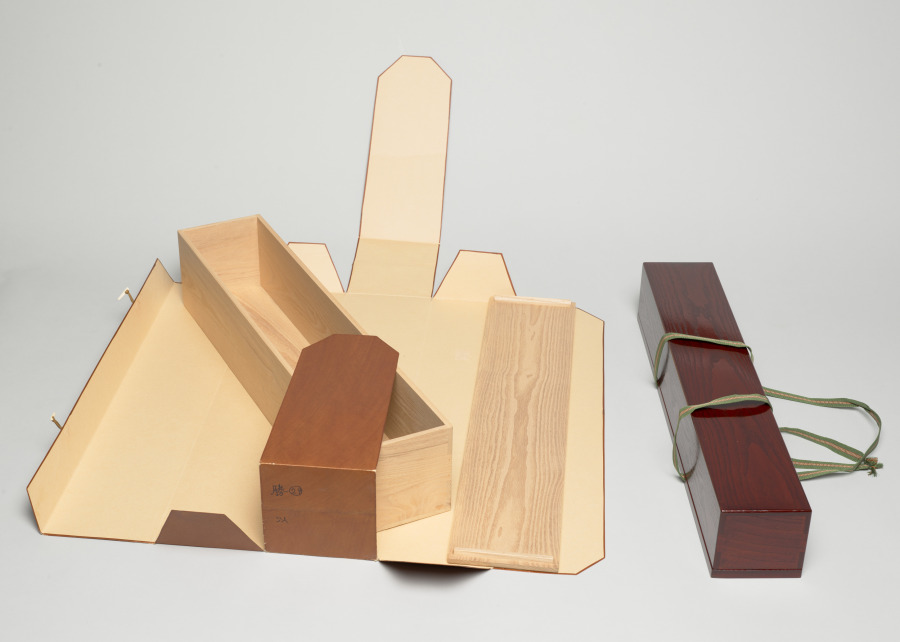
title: Coastal Landscape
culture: Japan, Momoyama period (1573–1615)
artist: Iwasa Matabei (Japanese, 1578–1650)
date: 1573–1615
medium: hanging scroll; ink on paper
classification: Painting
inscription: signed: signature unread